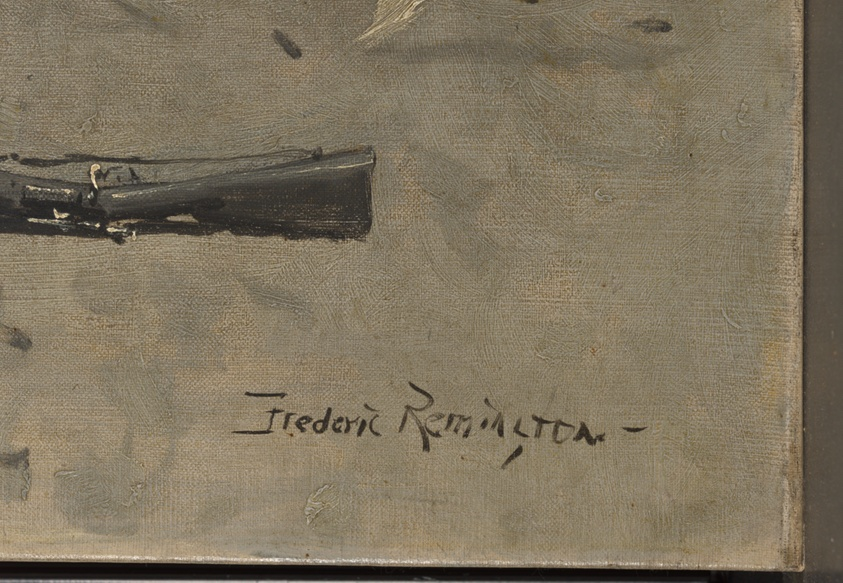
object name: Painting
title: How the Horses Died for Their Country at Santiago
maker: Frederic Remington (American, 1861–1909)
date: 1899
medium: Oil on canvas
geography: United States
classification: painting; american arts